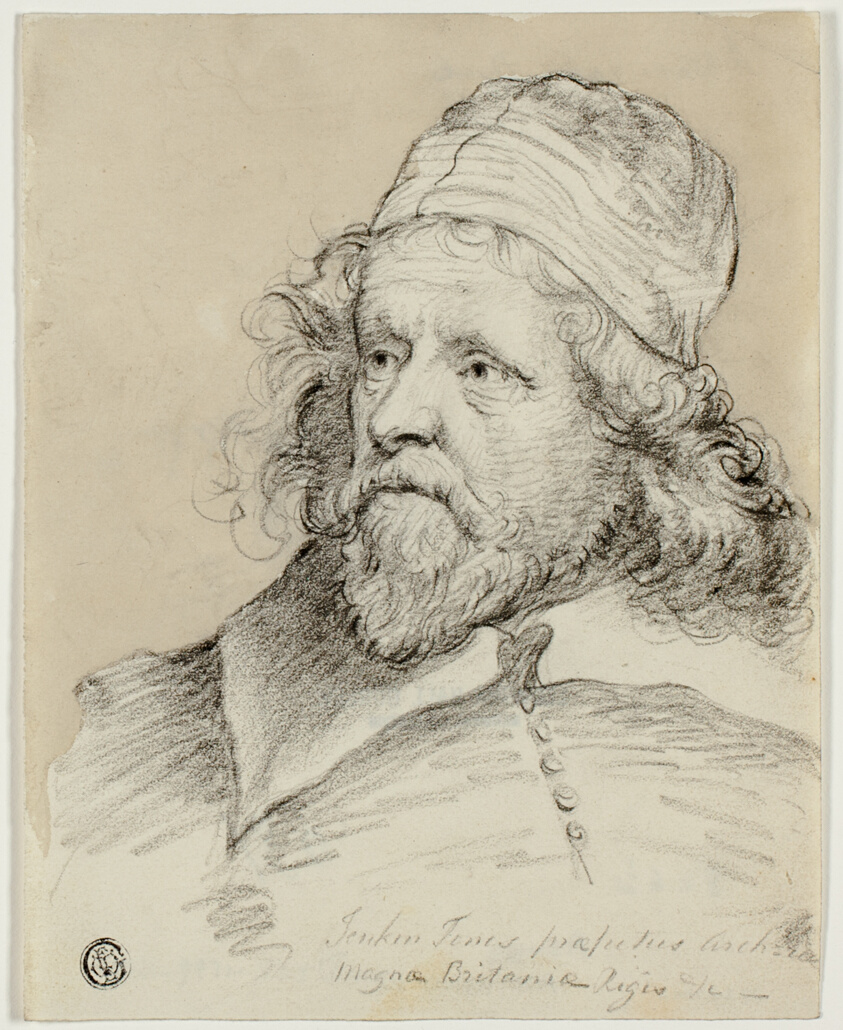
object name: Drawing and Watercolor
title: Inigo Jones (recto); Sketch of Female Head (verso)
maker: After Anthony van Dyck; Flemish, 1599-1641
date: c. 1790 (recto; n.d. (verso)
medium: Black chalk, with brush and pale brown wash (recto), and charcoal (verso), on ivory wove paper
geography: Flanders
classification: chalk; drawings (visual works); prints and drawing